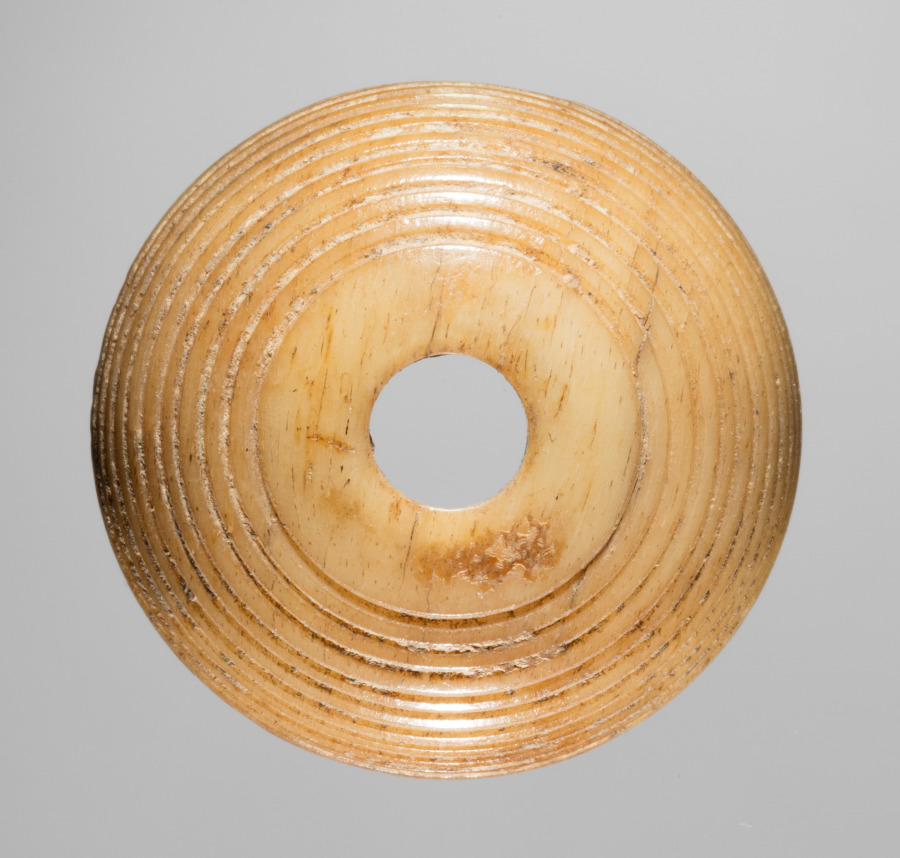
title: Spindle Whorl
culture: Iran, early Islamic period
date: 700s - 900s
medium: bone, incised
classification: Spindle Whorl